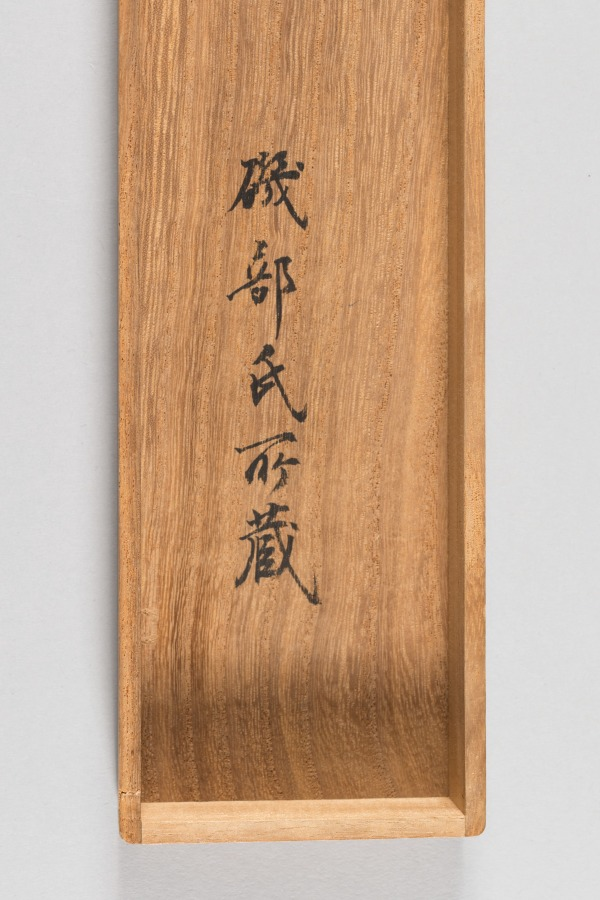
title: White-Robed Guanyin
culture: China, Yuan dynasty (1271-1368)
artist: copy after Jueji Yongzhong (Chinese, active around 1300)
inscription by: Zhongfeng Mingben (Chinese, 1263–1323)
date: late 1200s–early 1300s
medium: hanging scroll; ink and gold on silk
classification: Painting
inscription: Inscription: one of the 84,000 painted by the priest Insei.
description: The original model for this ink drawing of Guanyin, the bodhisattva of infinite compassion (Avalokiteshvara in Sanskrit), is CMA 1978.47.1. This drawing is a later copy with the same image of the White-Robed Guanyin, but in reverse. The inscription above reads: one of the 84,000 painted by the priest Insei. The inscription seems to indicate that the Japanese priest Insei repeatedly copied the image of the bodhisattva in an act of piety and to accumulate merit, as is promised in the Lotus Sutra for anyone who paints images of the Buddha, they “will achieve the Buddha path.” The priest’s name and seal need further study and identification.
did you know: The bodhisattva's face and halo were delicately painted in gold.